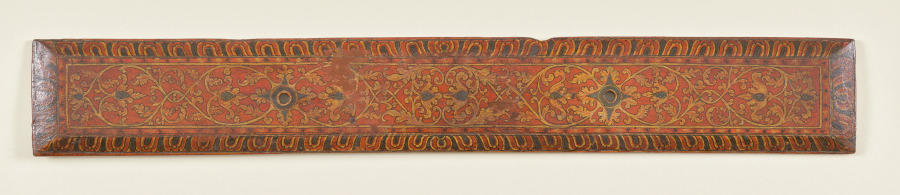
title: Top Cover for a Buddhist Manuscript (recto)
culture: Sri Lanka, Singhalese, Late 17th century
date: c. 1700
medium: Gum tempera on wood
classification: Manuscript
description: Palm leaf material is still used for manuscripts in Sri Lanka. The palm leaves are prepared first by boiling them, drying them in the sun, and then rubbing them with oils. Scribes then use a metal stylus to incise the text. Then charcoal powder is wiped across the pages, filling in only the inscribed lines.